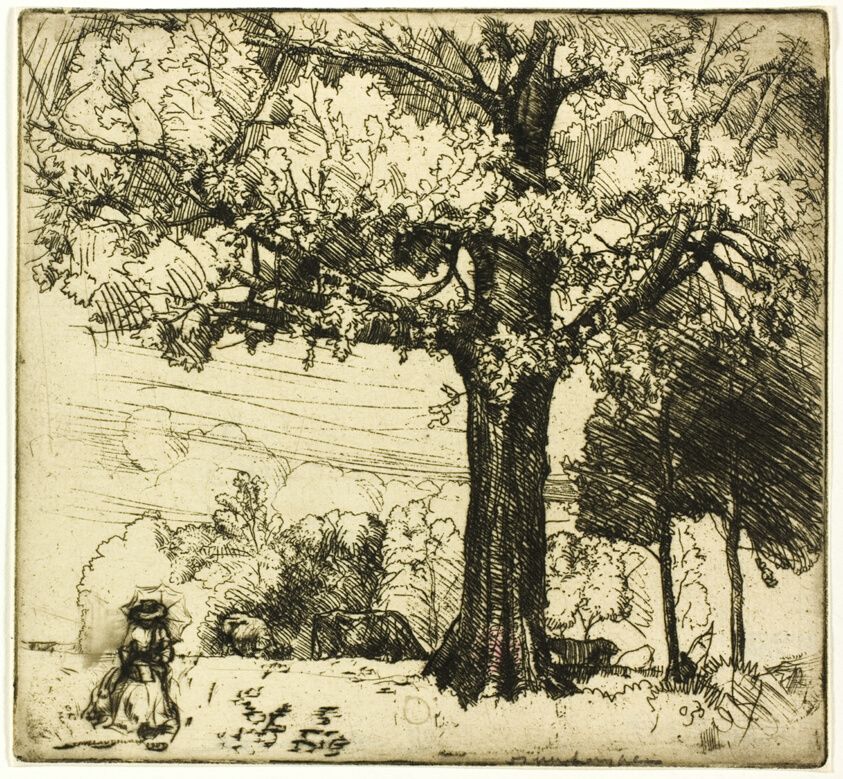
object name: Print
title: The Great Oak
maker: Donald Shaw MacLaughlan (American, born Canada, 1876-1938)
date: 1907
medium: Etching in black on cream laid paper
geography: United States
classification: etching; print; prints and drawing